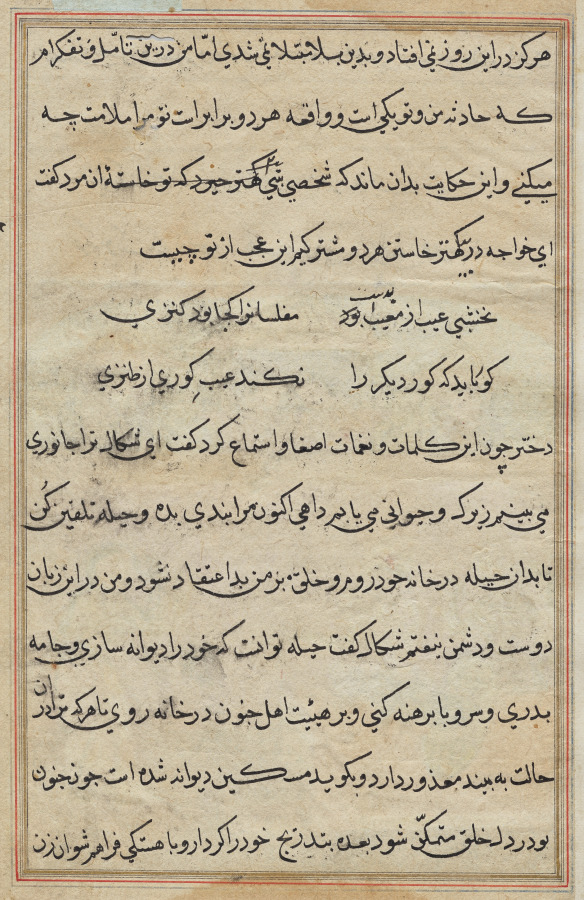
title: Page from Tales of a Parrot (Tuti-nama): text page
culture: Mughal India, court of Akbar (reigned 1556–1605)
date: c. 1560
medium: gum tempera, ink, and gold on paper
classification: Painting